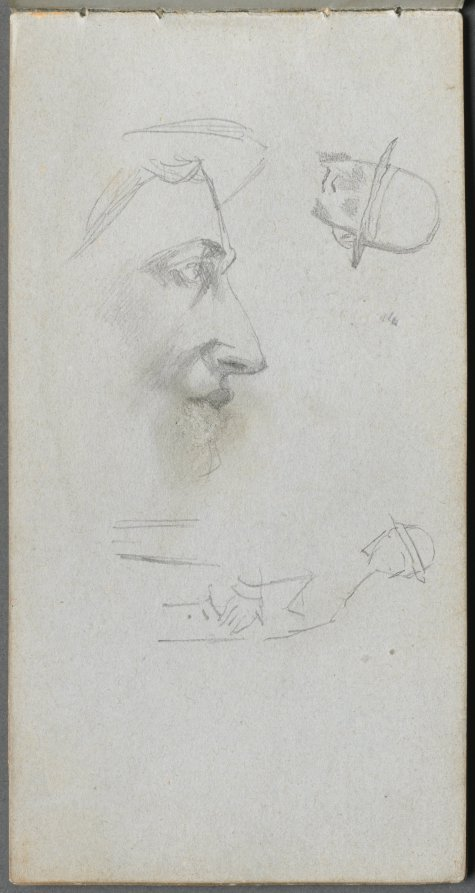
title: Sketchbook, page 14: Figures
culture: France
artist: Ernest Meissonier (French, 1815–1891)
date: c. 1860s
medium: graphite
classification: Bound Volume